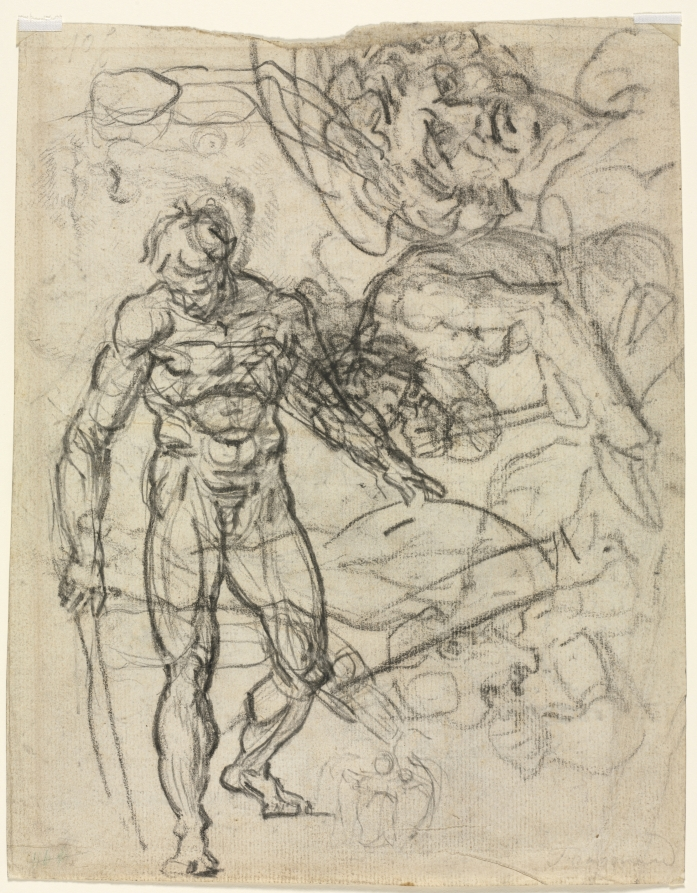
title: Figure Studies (verso)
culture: France, 18th century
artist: Jean-Honoré Fragonard (French, 1732–1806)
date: c. 1761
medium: black chalk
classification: Drawing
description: Quick drawings could serve a variety of purposes, and it is not always clear today why an artist created a particular sketch. This one may record a painting Fragonard saw during a journey to Italy, or capture an idea he was considering for a painting of his own. Orpheus, identified by the lute, grasps for his love Eurydice as she is pulled down into Hades. The snarling animals near his feet may represent Cerberus, the multiheaded guard dog of the underworld.